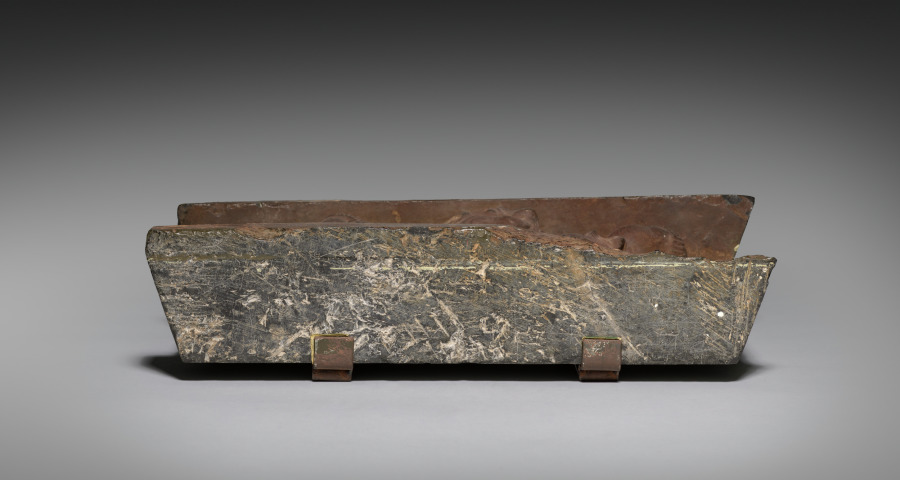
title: Monster Caryatid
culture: China, possibly from Xiangtangshan, Northern Qi dynasty (550–577)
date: late 500s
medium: Limestone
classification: Sculpture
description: This squatting monster with claws on its knees, braces its shoulders against an overhanging molding. The half-human, half-animal creature was likely part of a Buddhist cave-temple complex at Xiangtangshan, in Hebei Province, northwest China. Found in the lower registers of stone monuments of either architectural structures or statues of Buddhist deities, such monsters had a supportive function. Their scary appearance was believed to keep evil spirits away from the sacred sites.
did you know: The complex of Buddhist cave temples at Xiangtangshan, “Mountain of Echoing Halls,” is a central achievement of the Northern Qi period.